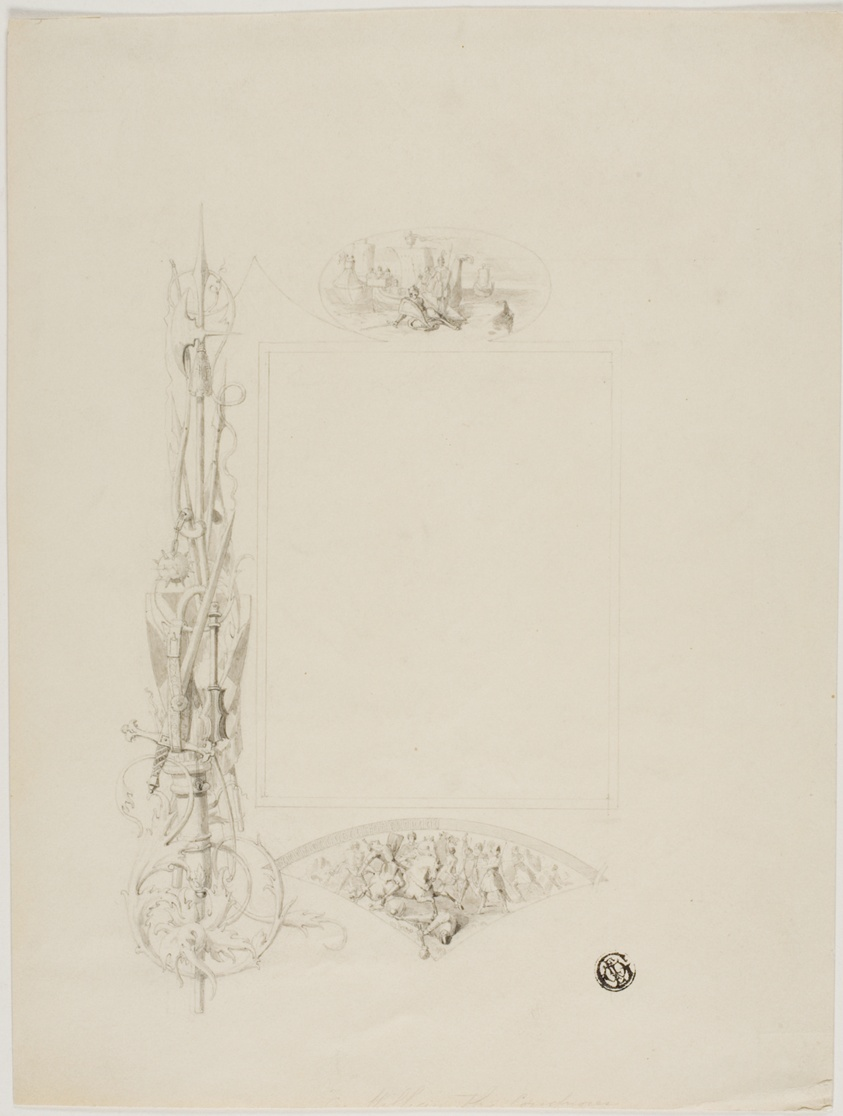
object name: Drawing and Watercolor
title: Vignette for Menu Card Decorated with Arms and Heroic Scenes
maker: Unknown Artist; French, 19th century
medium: Graphite, with brush and gray wash, on cream wove paper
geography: France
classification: graphite; drawings (visual works); prints and drawing